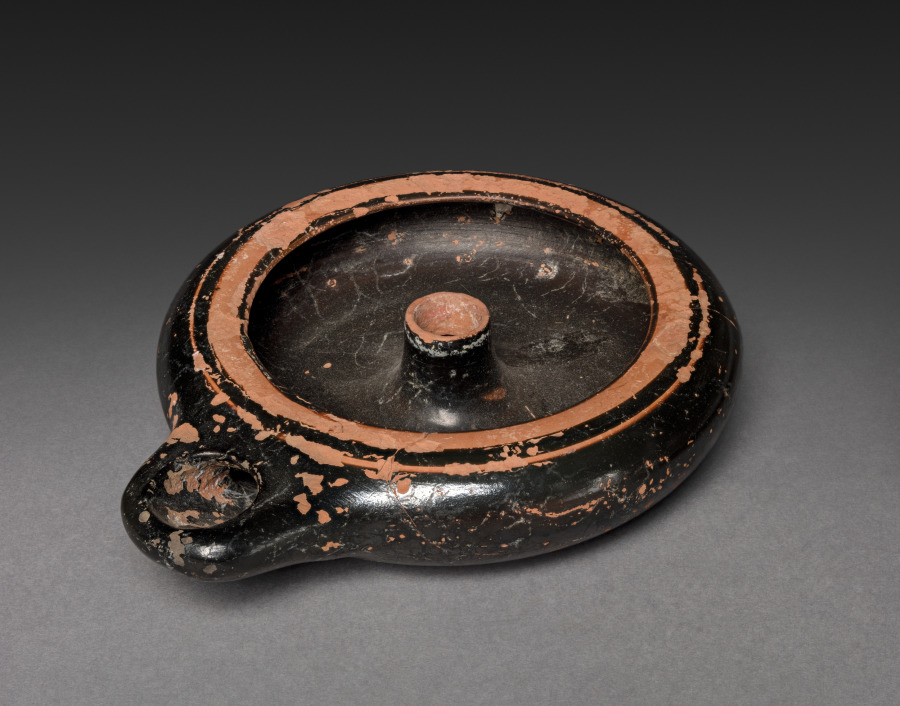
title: Black-Gloss Oil Lamp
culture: Greek, Attic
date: 400s BCE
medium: ceramic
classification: Ceramic